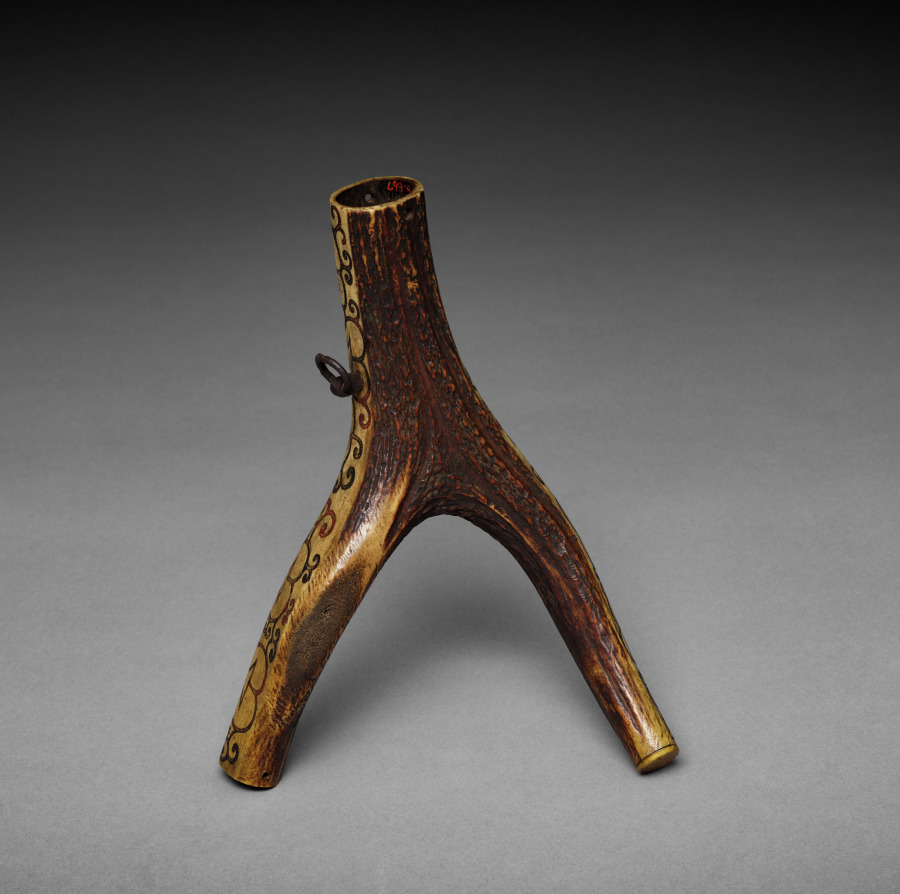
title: Powder Flask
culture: Transylvanian, late 17th-early 18th century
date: c. 1675–1725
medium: staghorn (two branches) with incised and painted geometric decoration; mounts missing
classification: Arms and Armor